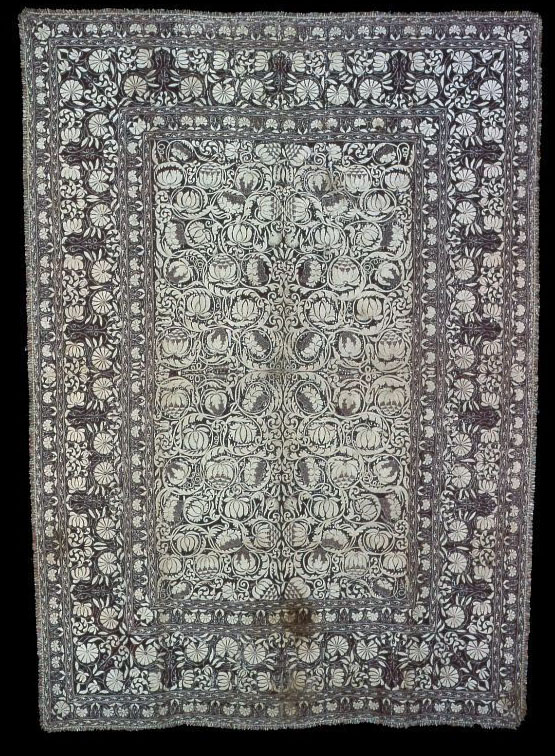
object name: Textile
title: Hanging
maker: Portugal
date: 1675/1725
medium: Face and backing: Cotton, plain weave; embroidered through both thicknesses with cotton, in chain stitch; French Knots; fringe border: silk, plain weave with weft fringe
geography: Portugal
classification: textile; weaving; needlework (visual works)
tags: flowers